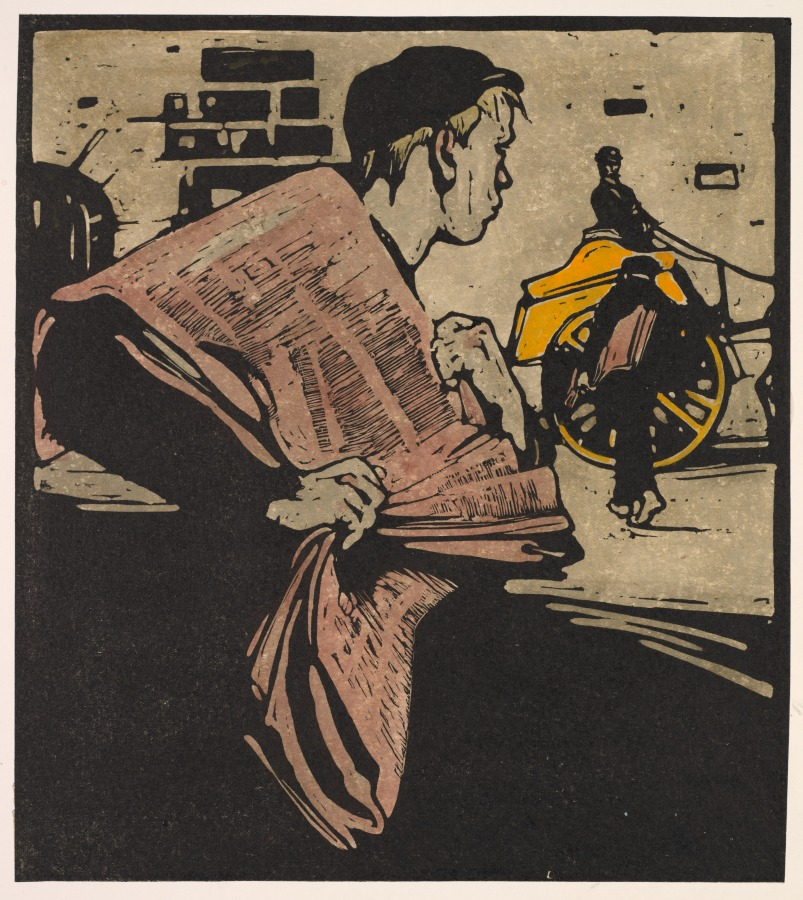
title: London Types: News-boy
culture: England, 19th century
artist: William Nicholson (British, 1872–1949)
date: 1898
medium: woodcut hand-colored with watercolor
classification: Print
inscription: lower left margin, in black ink: William Nicholson - 1898 -